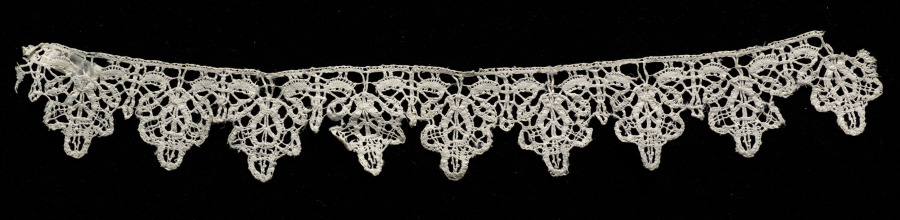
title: Lace Edging with Points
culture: Italy, Genoa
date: 1600s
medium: Bobbin lace (Rose Lace)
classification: Lace